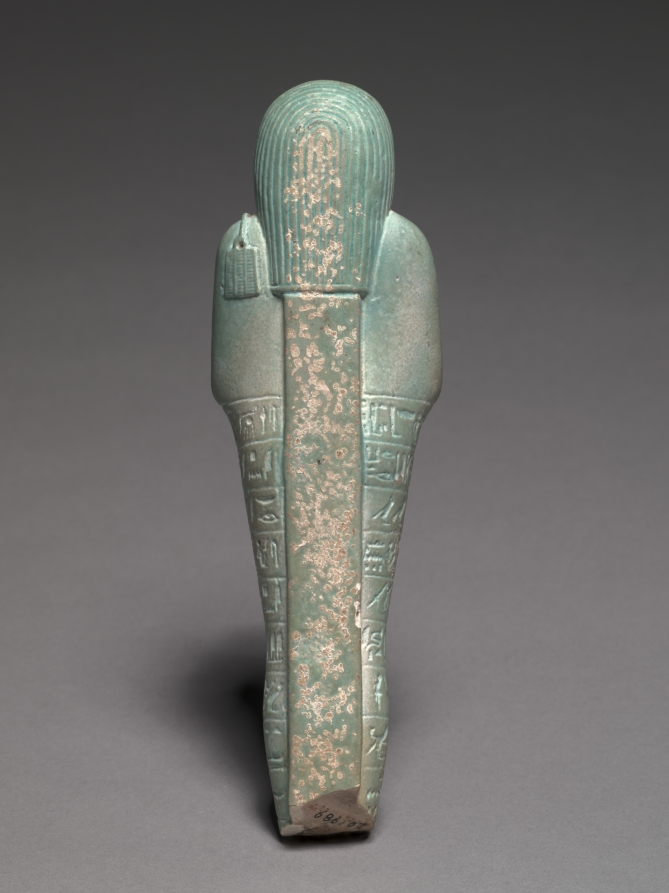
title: Shawabty of Nectanebo II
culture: Egypt, Late period (715–332 BCE), Dynasty 30, reign of Nectanebo II (358–340 BCE)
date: 360–342 BCE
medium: pale turquoise faience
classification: Funerary Equipment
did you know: Nectanebo II is the last Egyptian native to be pharaoh. This small statuette has idealized facial features and bears an inscription on the lower half that contains a wish for the afterlife.